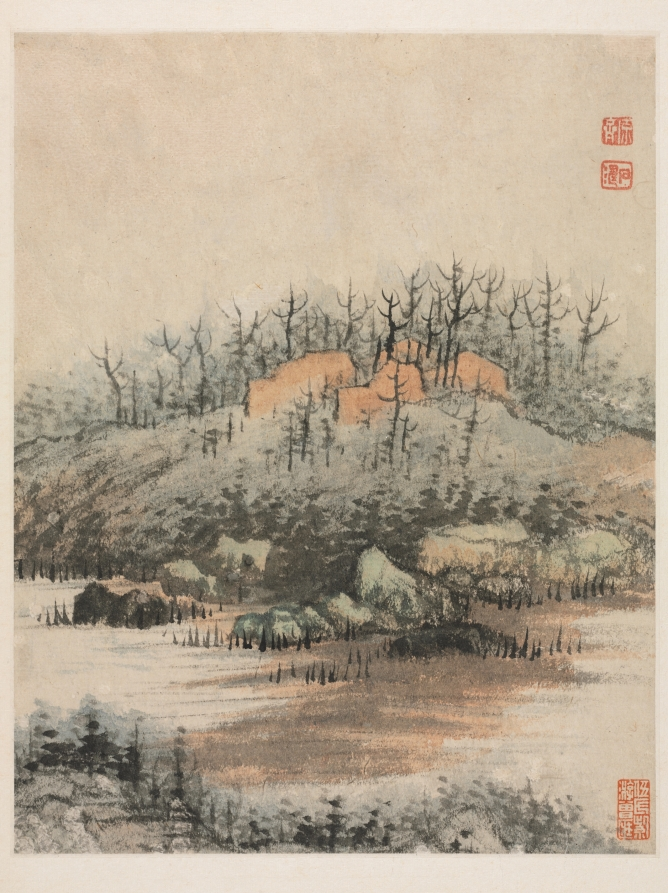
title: Reminiscences of Qinhuai River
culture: China, Qing dynasty (1644-1911)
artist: Shitao (Chinese, 1642–1707)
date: 1642–1707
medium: album leaf, ink and color on Song paper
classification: Painting